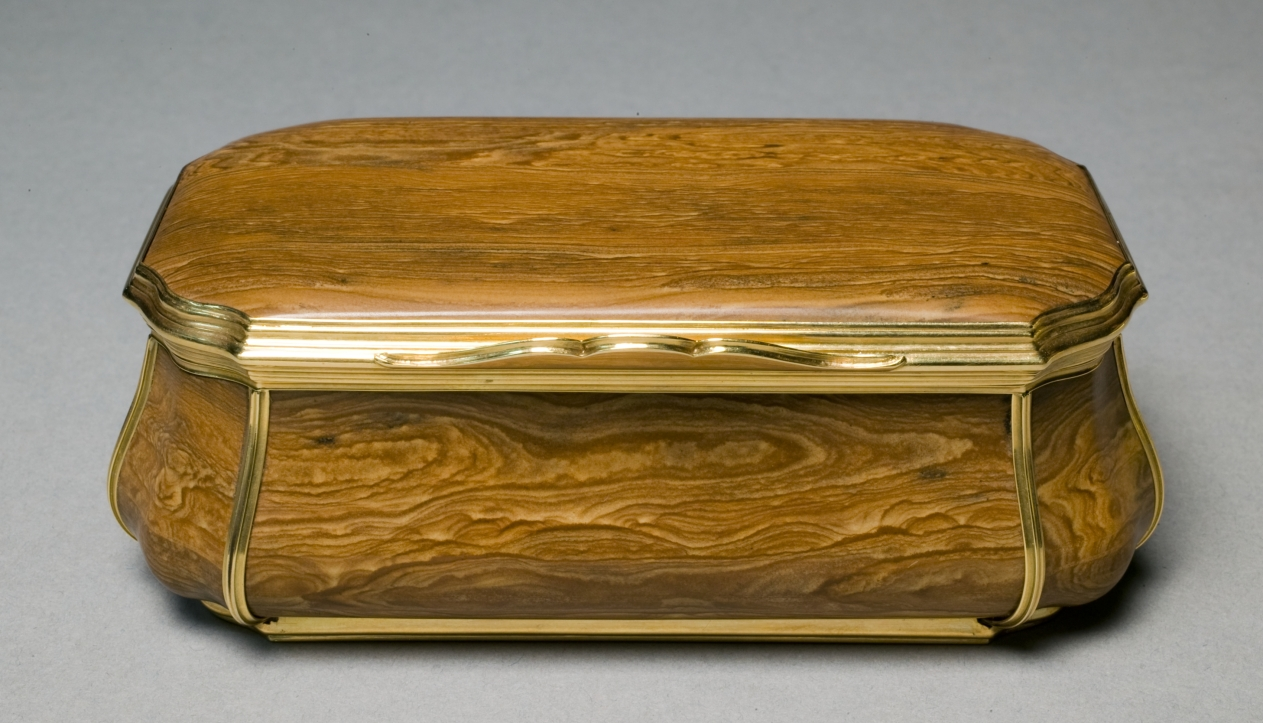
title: Snuff Box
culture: Germany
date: c. 1830–50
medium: agate, gold, silver, diamonds, rubies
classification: Miscellaneous